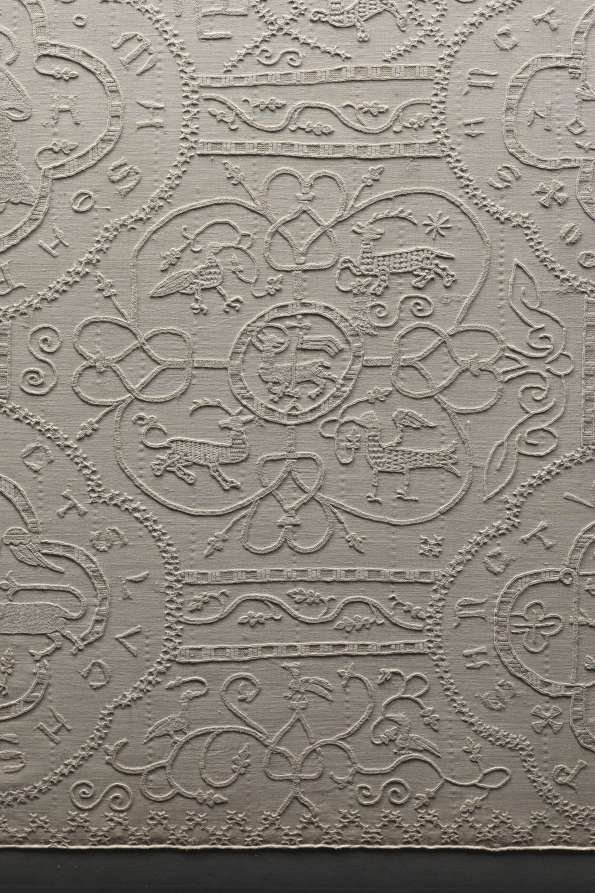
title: Altar Cloth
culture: Germany, Altenberg on the Lahn, Premonstratensian Convent, 14th century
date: c. 1350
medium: embroidery: linen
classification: Embroidery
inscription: various motifs enclosed in quatrefoils with identifying inscriptions in Gothic letters.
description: This large, embroidered altar cloth is one of the rarest, most important medieval church furnishings in existence. It was stitched by nuns in the Premonstratensian Convent in Altenberg on the Lahn River, north of Frankfurt, Germany, and was used to cover the church’s high altar in the weeks leading up to Easter. The cloth is an example of linen embroidery, a specialty of German nuns in the later Middle Ages. The Altenberg monastery church once had valuable furnishings; the high altar retable (a decorated frame with sculptures and paintings on the top of an altar) has survived, the main parts of which are now in the Städel Museum in Frankfurt, Germany.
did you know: When lit from behind, the previously hidden details emerge and the complex design becomes evident.